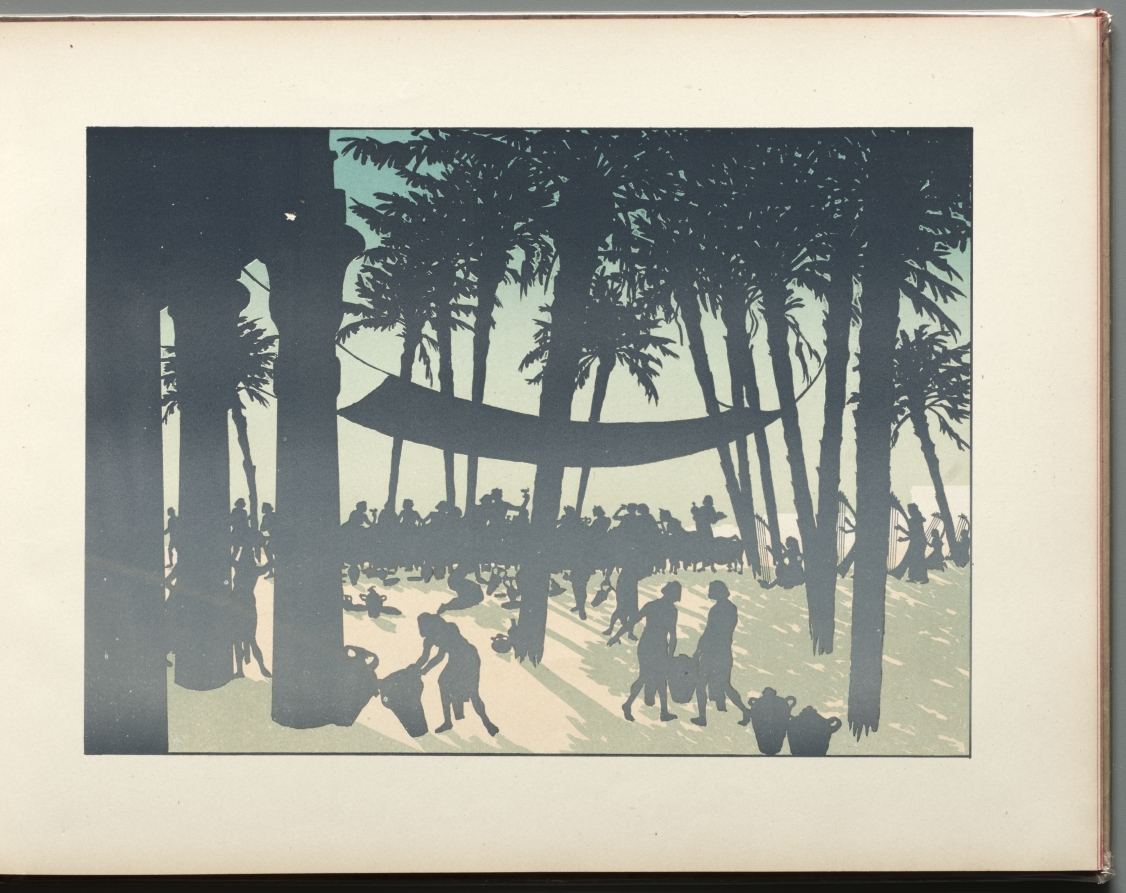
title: The Prodigal Son: Troisième Tableau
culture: France, 19th century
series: Bound Volume illustrating the poetry and music of Georges Fragerolle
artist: Henri Rivière (French, 1864–1951)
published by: E. Flammarion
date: 1895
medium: 15 color lithographs in a bound volume illustrating the poetry and music of Georges Fragerolle: color lithograph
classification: Bound Volume